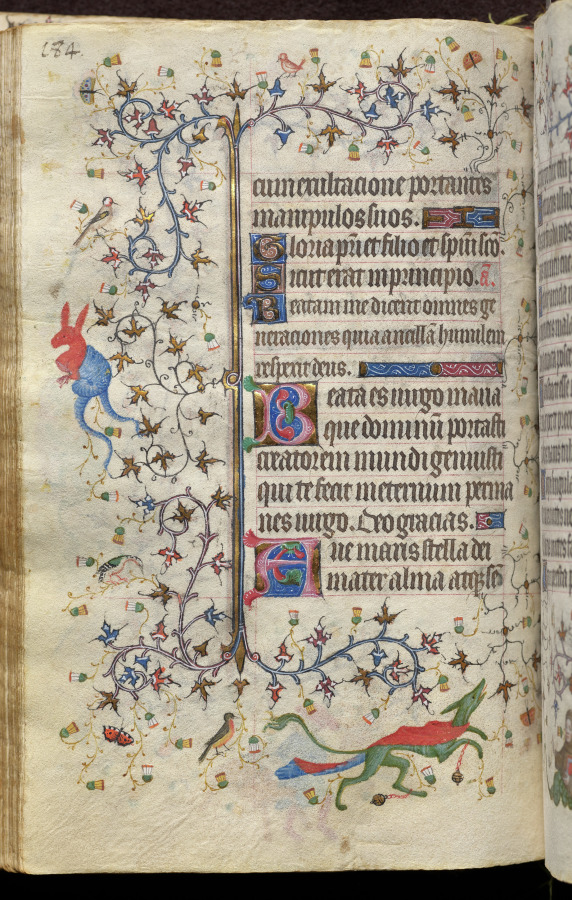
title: Hours of Charles the Noble, King of Navarre (1361-1425): fol. 92v, Text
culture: France, Paris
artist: Master of the Brussels Initials and Associates (French)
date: c. 1405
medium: ink, tempera, and gold on vellum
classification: Bound Volume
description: This precious volume was obviously highly prized by its owner, the French-born King of Navarre, who had his coat of arms painted on no less than twenty folios. Rather than directly commissioning this manuscript from a specific workshop, it seems that Charles the Noble acquired his book of hours -- perhaps ready-made for the luxury market -- while on a trip to Paris in 1404-05. A collaborative effort, six painting styles are evidenced within the pages of this codex, those of two Italians, two Frenchmen, and two Netherlanders. The painter who was responsible for the planning and decoration of the book, and who produced seventeen of the large miniatures, was a Bolognese artist known as the Master of the Brussels Initials. His principal assistant, responsible for most of the borders, was a Florentine who signed his name "Zecho" da Firenze on folio 208 verso.